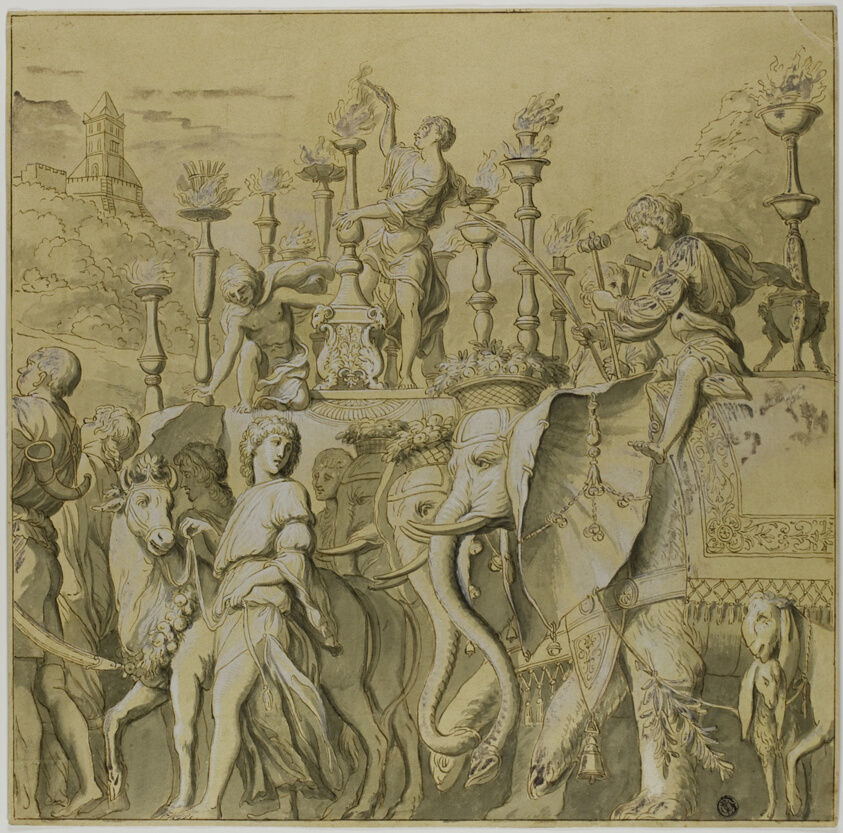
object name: Drawing and Watercolor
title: Triumphs of Julius Caesar: Canvas No. V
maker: After Andrea Mantegna; Italian, 1431-1506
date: 18th century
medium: Pen and brown ink, with brush and gray wash, heightened with lead white (oxidized), on cream laid paper prepared with yellow wash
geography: Italy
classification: pen and ink drawings; drawings (visual works); prints and drawing